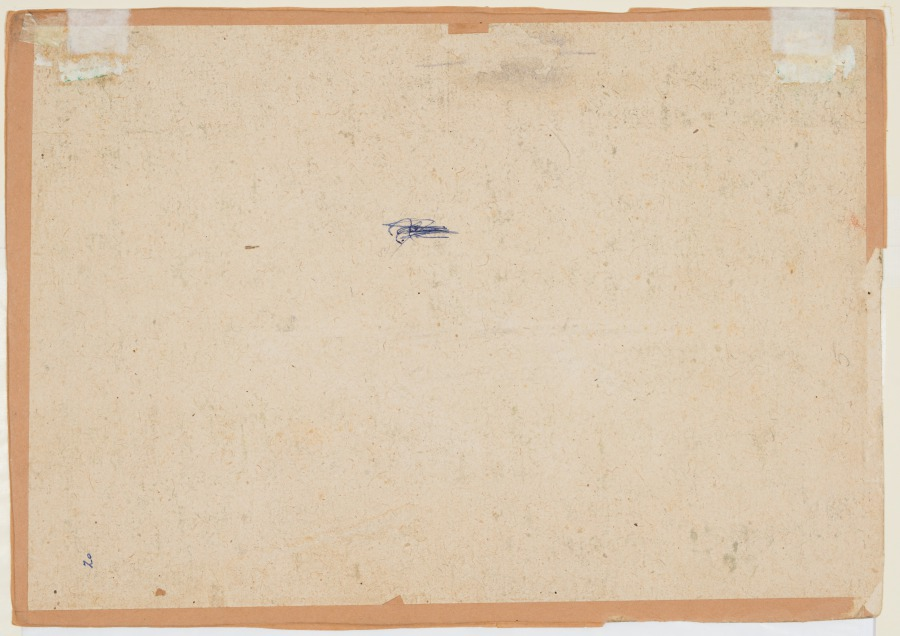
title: Rama and Lakshmana slay the demon giant Viradha, from Chapters 2 through 4 of the Aranya Kanda (Book of the Forest) of a Ramayana (Rama’s Journey)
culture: Central India, Bundelkhand Region, Madhya Pradesh, Rajput Kingdom of Datia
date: c. 1770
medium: gum tempera and gold on paper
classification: Painting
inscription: [[verso, at lower right, sideways]] 20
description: Viradha was once a celestial musician named Tumburu, who was cursed by Kubera, guardian king and god of wealth, to turn into a demon until he was killed by Rama. During their exile, when the hero Rama, his brother Lakshmana, and wife Sita were venturing in the Dandaka Forest, the demon appeared in front of the divine party and abducted Sita. Rama and Lakshmana slayed the demon and rescued Sita, and Viradha was freed from his curse.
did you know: Rama is depicted with a green complexion in central and southern India.